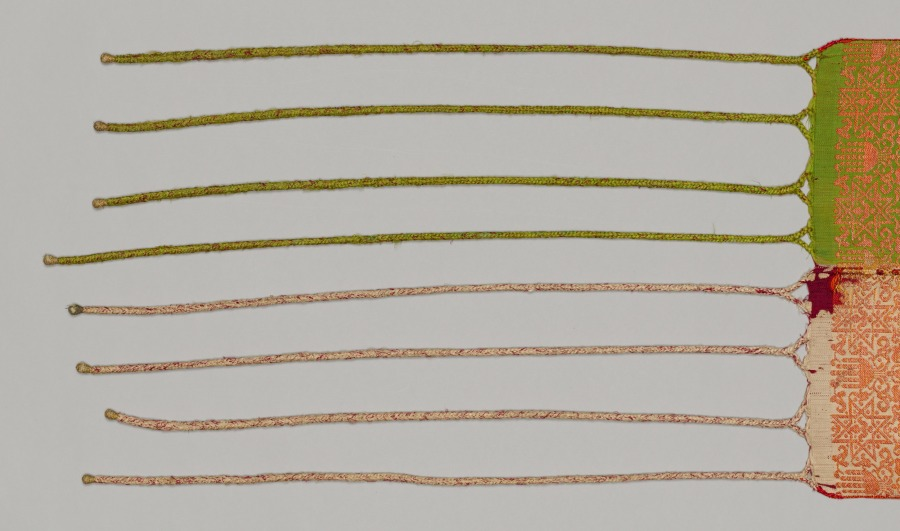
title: Belt (Hizam)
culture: Africa, North Africa, Morocco, Fes, Moroccan weaver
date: 1800s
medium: Silk, dye, metal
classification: Textile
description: Elaborate wedding sashes woven in Fez, Morocco, are distinctive for their multiple colors, designs, and uses. Folded lengthwise, they are wrapped around the waist so that the colors and designs coordinate with the attire worn during and after a wedding. Typically, the colors vary on each half although the designs are the same. Luxury textiles with elaborate patterns were woven on large looms called drawlooms that automatically repeated designs. The weaver operated the structure, inserting horizontal wefts, while the drawboy activated the programmed pattern. However, this wedding sash has ten programmed designs, which required considerable expertise.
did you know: Women sometimes added starch to stiffen these belts.